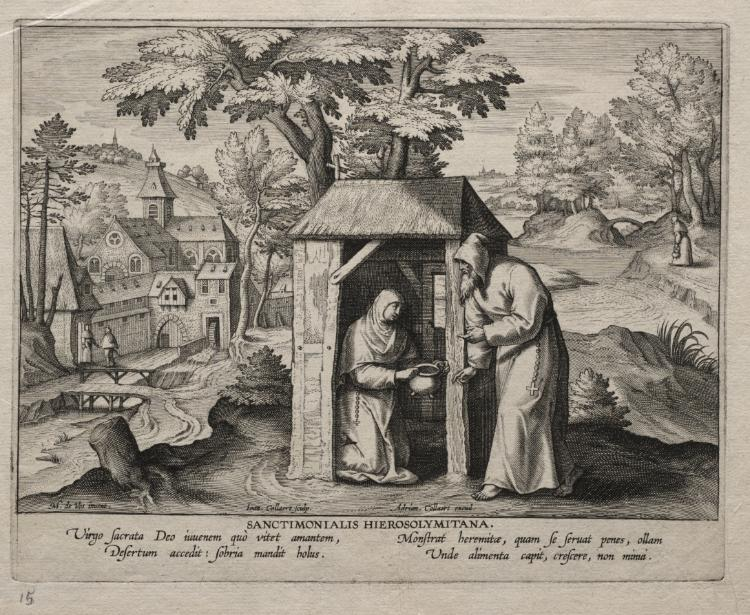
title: Saint Jerome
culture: Flanders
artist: Hans Collaert (Flemish, 1566–1628)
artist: after Maarten de Vos (Flemish, 1532–1603)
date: 1580–1600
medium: engraving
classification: Print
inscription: lower margin, in graphite: 15